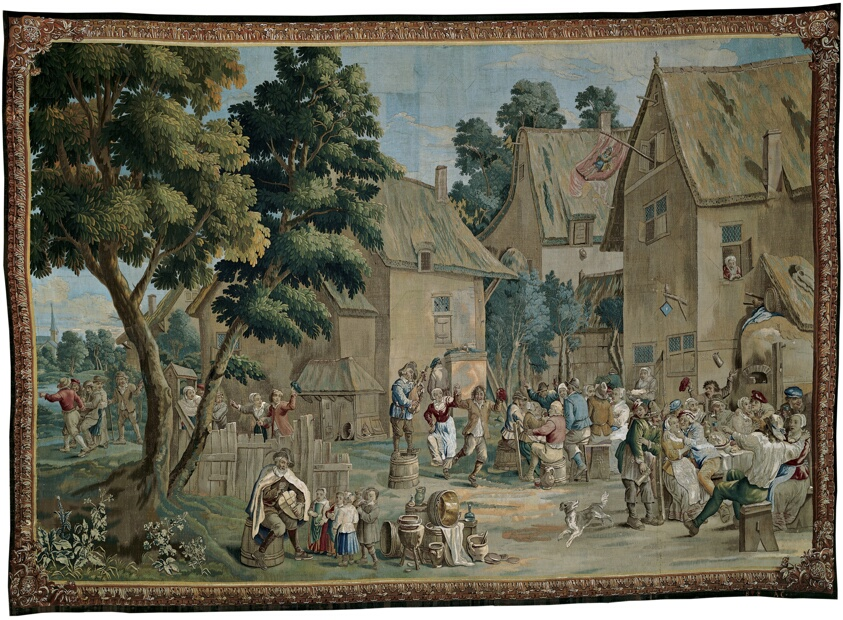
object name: Textile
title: Village Fete (Saint George's Fair), from a Teniers series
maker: After a design by David II Teniers (1610–1690); Woven at the workshop of Gaspard (Jasper) van der Borcht (1675–1742); Flanders, Brussels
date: c. 1710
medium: Wool and silk, slit and double interlocking tapestry weave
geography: Brussels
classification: weaving - tapestry; textile